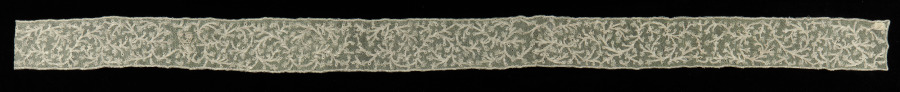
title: Lace Insertion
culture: Italy, Burano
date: 1700s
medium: Silk: needle lace (Burano Point) insertion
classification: Lace